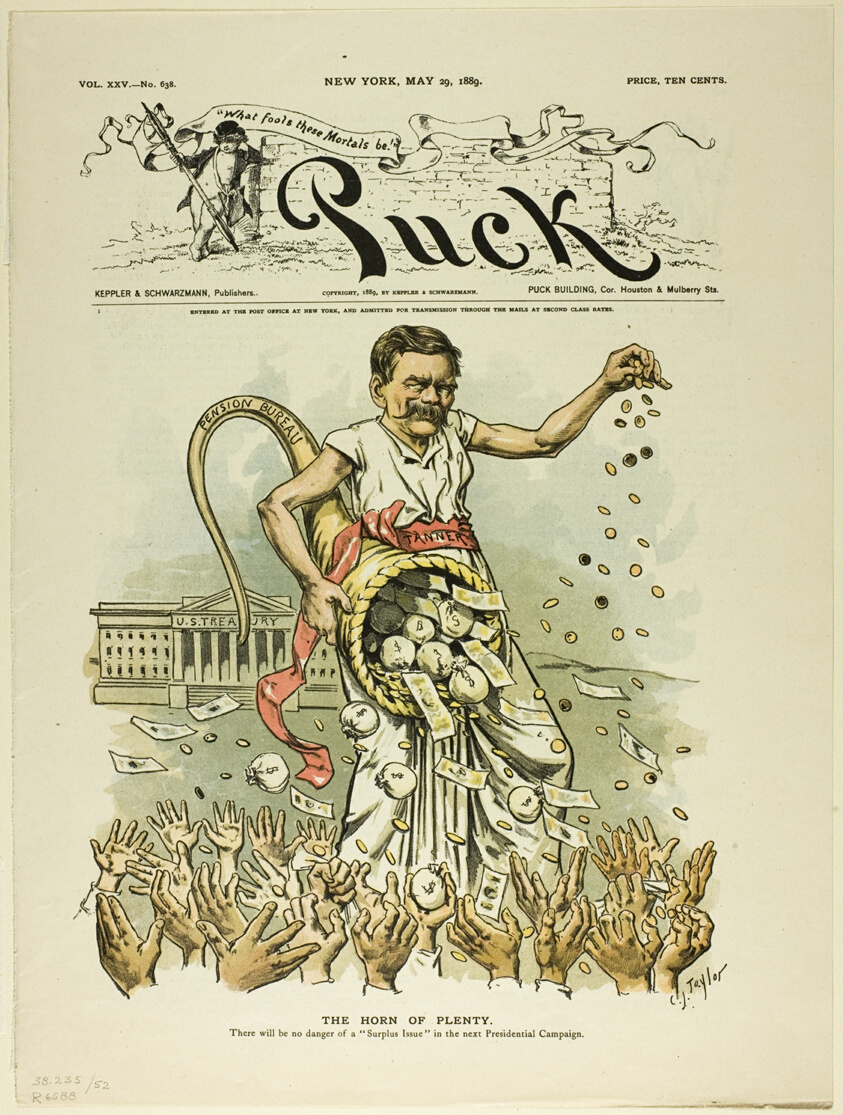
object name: Print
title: The Horn of Plenty, from Puck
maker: C. Jay Taylor (American, 1855-1929)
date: published May 29, 1889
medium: Color lithograph on newsprint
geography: United States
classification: lithograph; print; prints and drawing